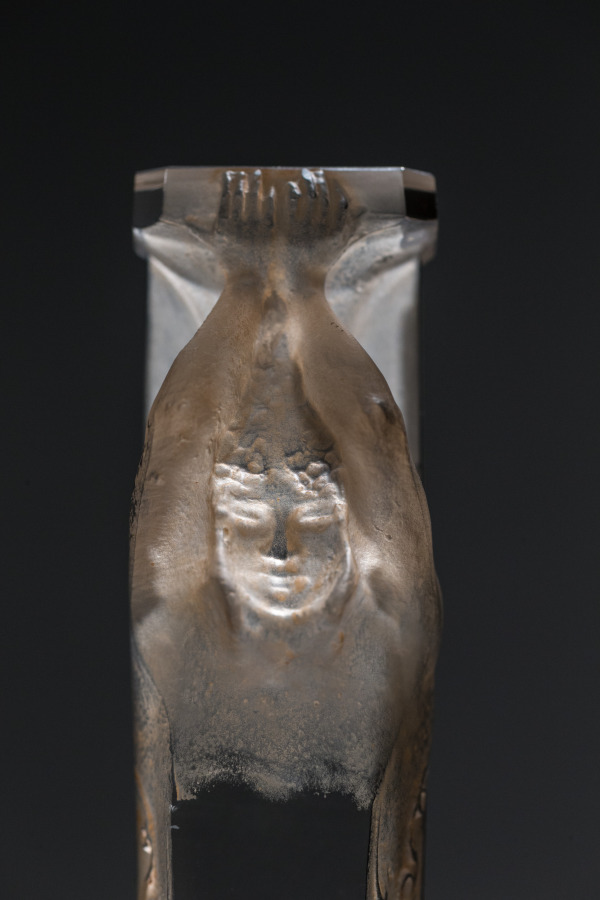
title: Bacchus Figural Centerpiece Support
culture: France, 20th century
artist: René Lalique (French, 1860–1945)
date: 1923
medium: Cast and patinated glass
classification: Glass